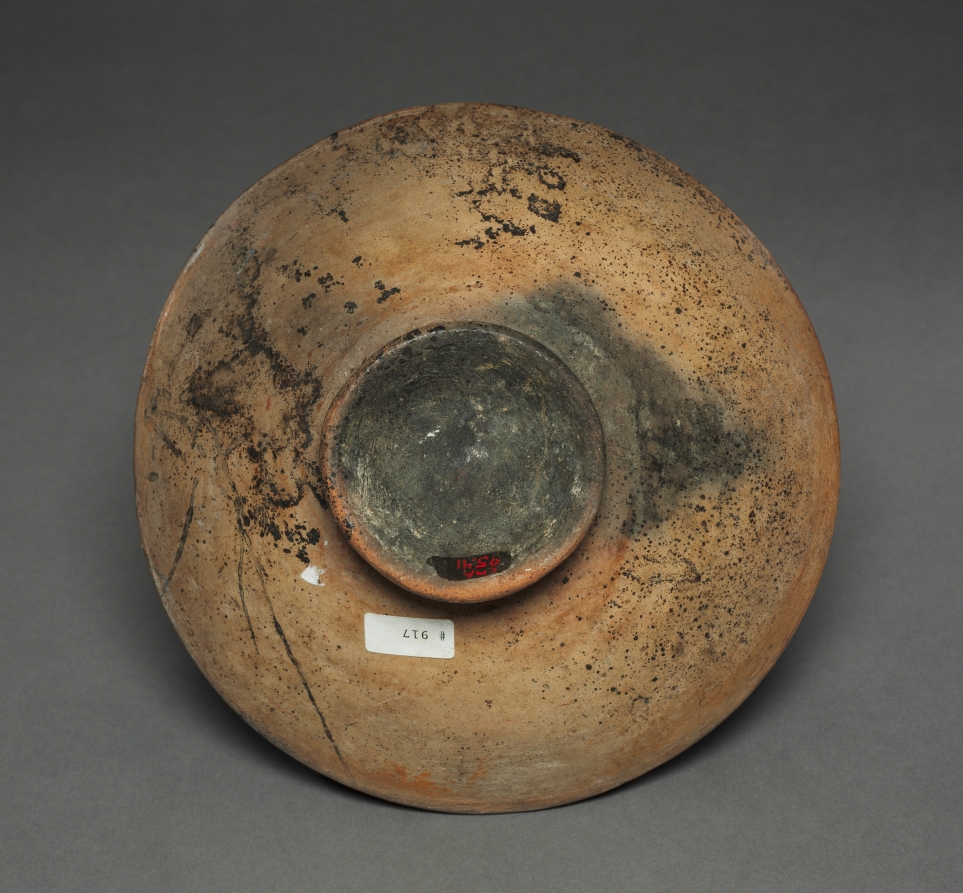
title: Bowl with Spider Decoration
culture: Colombia, Highland Nariño region, Piartal style, 8th-13th Century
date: c. 750–1250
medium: ceramic, slip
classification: Ceramic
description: In the Nariño region of southwestern Colombia, the dead were buried in shaft tombs, the most elaborate up to sixty feet deep and furnished with offerings such as these bowls. Colombian ceramics are not much studied and little can be said about their imagery, which reveals a keen interest in geometric abstraction. Depicted here are a row of figures with thatch-roofed huts, humans attacked by birds, and spiders.